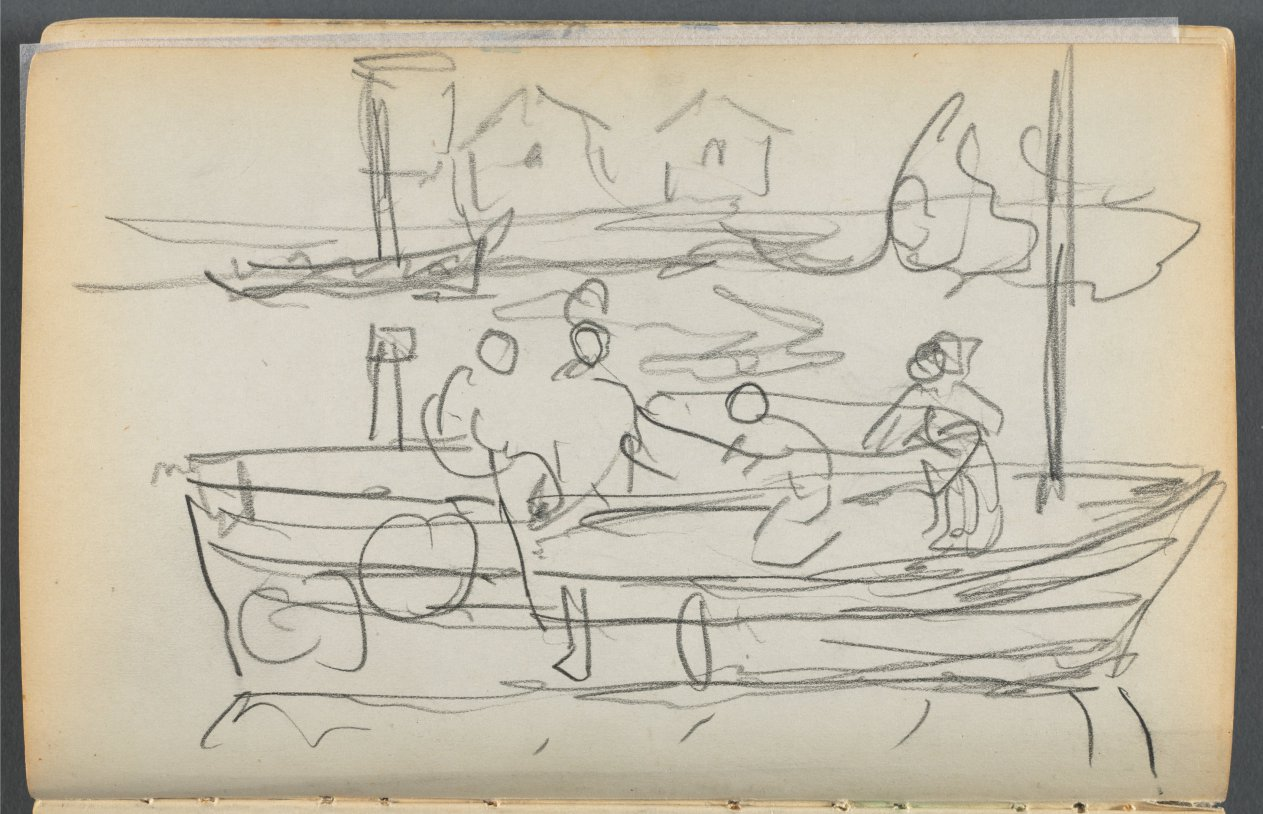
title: Sketchbook- The Granite Shore Hotel, Rockport, page 032: Figures on a Boat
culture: America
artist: Maurice Prendergast (American, born Newfoundland [now Canada], 1858–1924)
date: 1905–10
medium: graphite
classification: Bound Volume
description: This sketchbook contains 72 pages of pencil drawings and 9 watercolors of Cape Ann. On the inside of the cover Prendergast wrote the address of the Granite Shore Hotel in Rockport, Massachusetts.